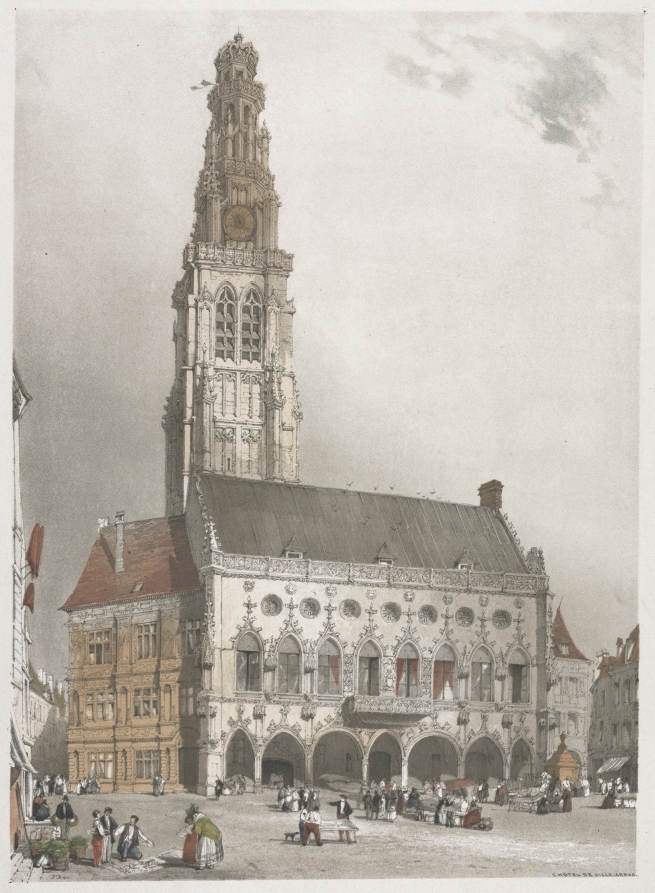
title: Picturesque Architecture in Paris, Ghent, Antwerp, Rouen: L'Hôtel de Ville, Arras, France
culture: England, 19th century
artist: Thomas Shotter Boys (British, 1803–1874)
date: 1839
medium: lithograph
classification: Portfolio